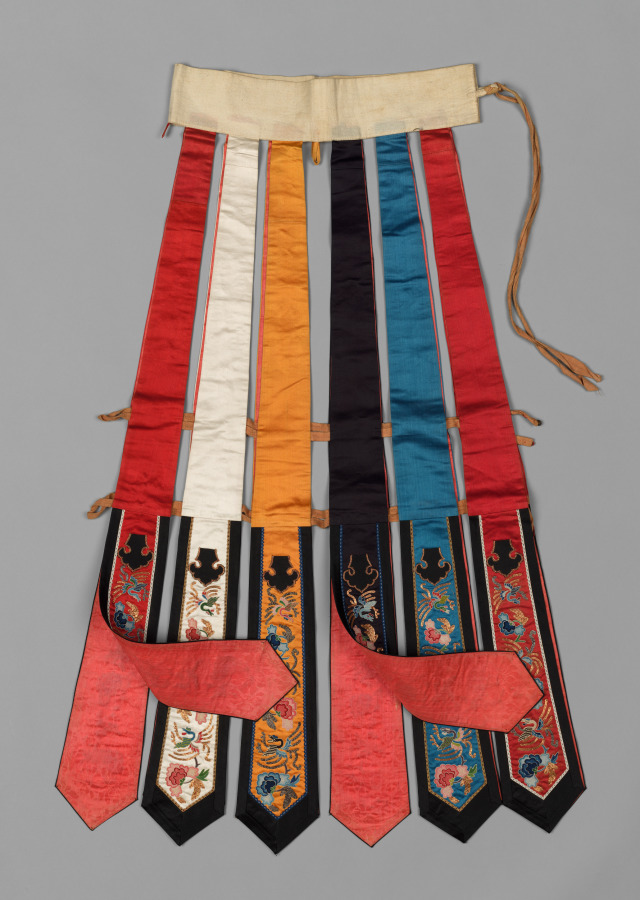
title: Rainbow Skirt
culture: China, Qing dynasty (1644-1911)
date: late 1800s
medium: Silk: embroidery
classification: Garment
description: This bridal garment is referred to as a rainbow skirt. Originally jingling bells hung from the ends of each strip.